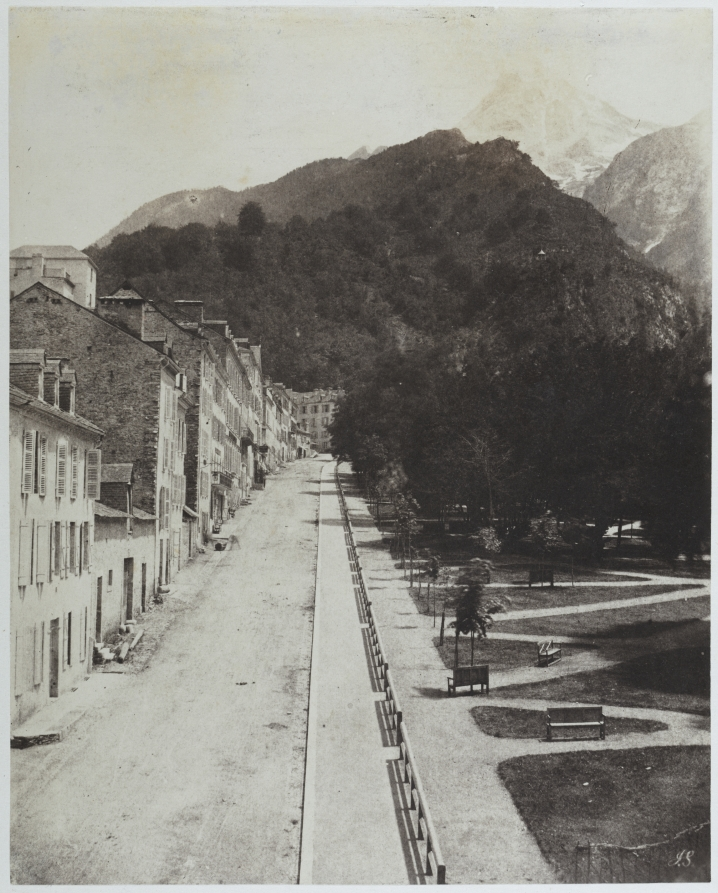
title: The Good Waters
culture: England, 19th century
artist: John Stewart (British, 1800–1887)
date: 1852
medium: salted paper print, lightly varnished, from a paper negative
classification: Photograph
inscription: Written in pencil on recto of mount: "Les eaux Bonnes" Written in pencil on verso: "1200C"